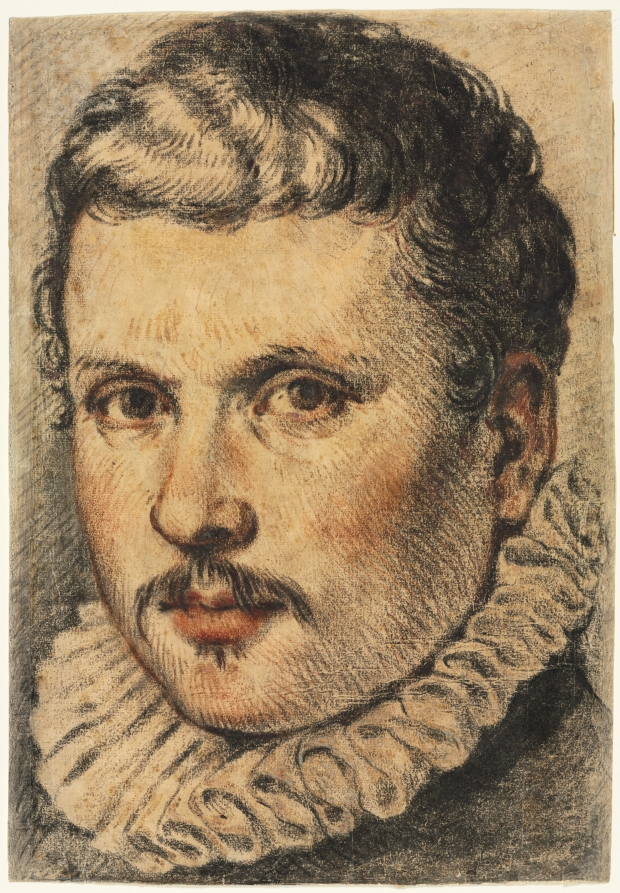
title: Portrait of a Man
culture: Italy, 16th century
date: 1500s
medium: black and red chalk, with brown and purple chalk, heightened with white gouache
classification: Drawing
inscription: VERSO (on separately mounted perimeter strip), lower center, in graphite: Daniel Du Moustier : 1574-1646 / French Crayon [underlined] and Pastel artist. Worked for Francis I / and Henry IV. Drew Portraits of all the distinguished men of the Time.